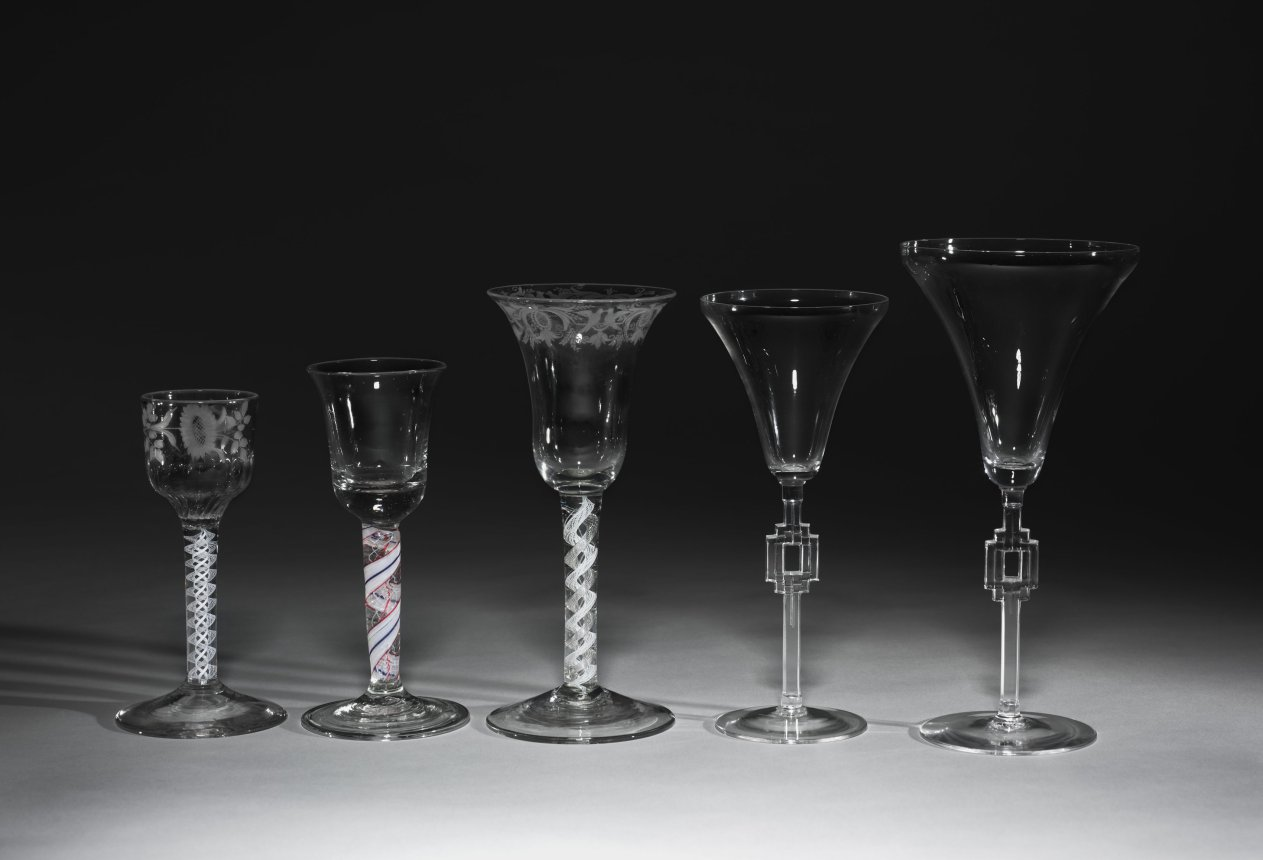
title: Goblet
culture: England, 18th century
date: c. 1725–1750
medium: glass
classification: Glass